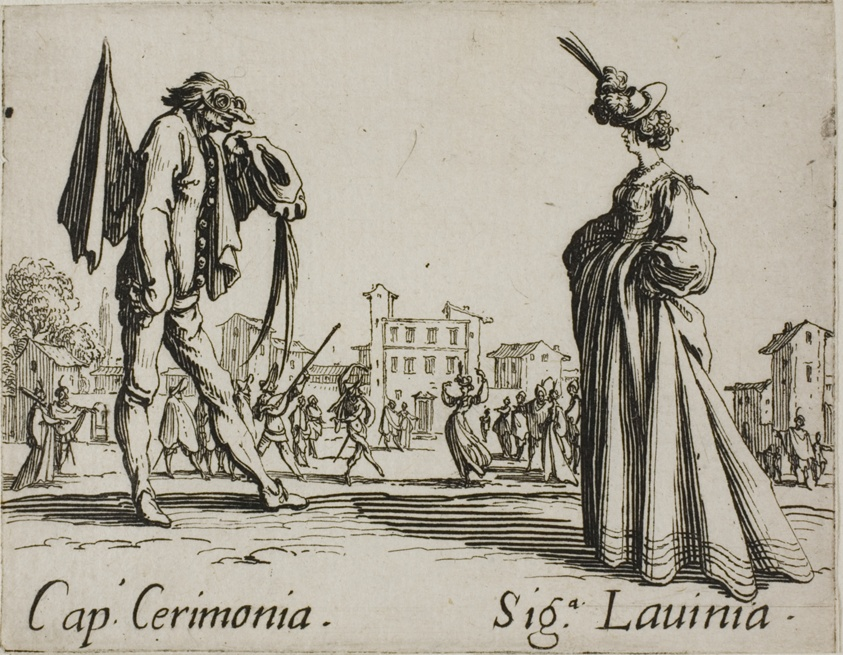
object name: Print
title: Capitano Cerimonia - Signora Lavinia, plate 3 from Balli di Sfessania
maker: Jacques Callot (French, 1592-1635)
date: c. 1622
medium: Etching and engraving on paper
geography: France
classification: etching; print; prints and drawing